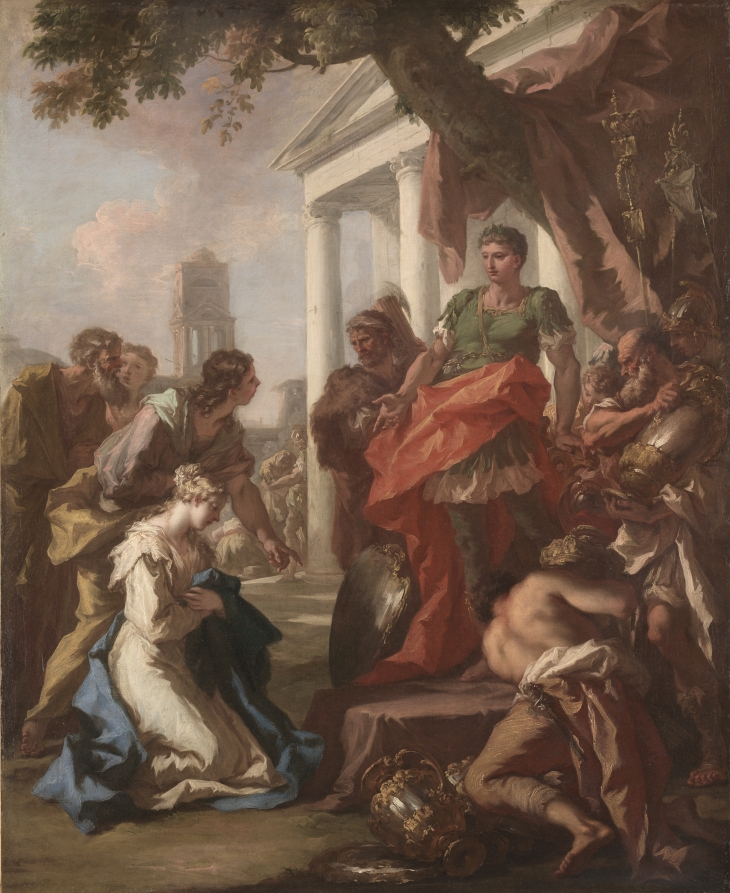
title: The Continence of Scipio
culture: Italy, 18th century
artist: Giovanni Antonio Pellegrini (Italian, 1675–1741)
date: c. 1710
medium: oil on canvas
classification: Painting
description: In a story of virtuous leadership and wise government, the Roman commander Scipio Africanus the Elder appears after his stunning conquest of New Carthage in Spain in 209 BC. Standing above the crowd, he returns his victor’s reward--a beautiful young woman--to her husband.